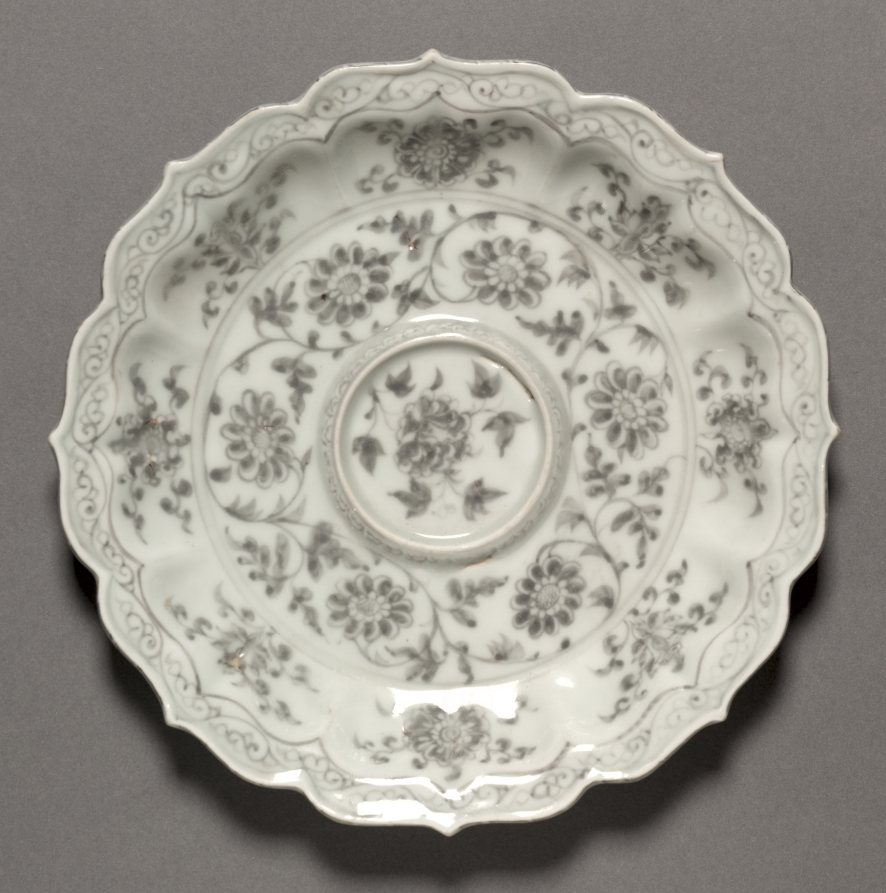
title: Cupstand with Floral Scrolls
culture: China, Ming dynasty (1368-1644), Hongwu reign (1368-1398)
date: 1368–1398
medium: porcelain painted in underglaze red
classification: Ceramic